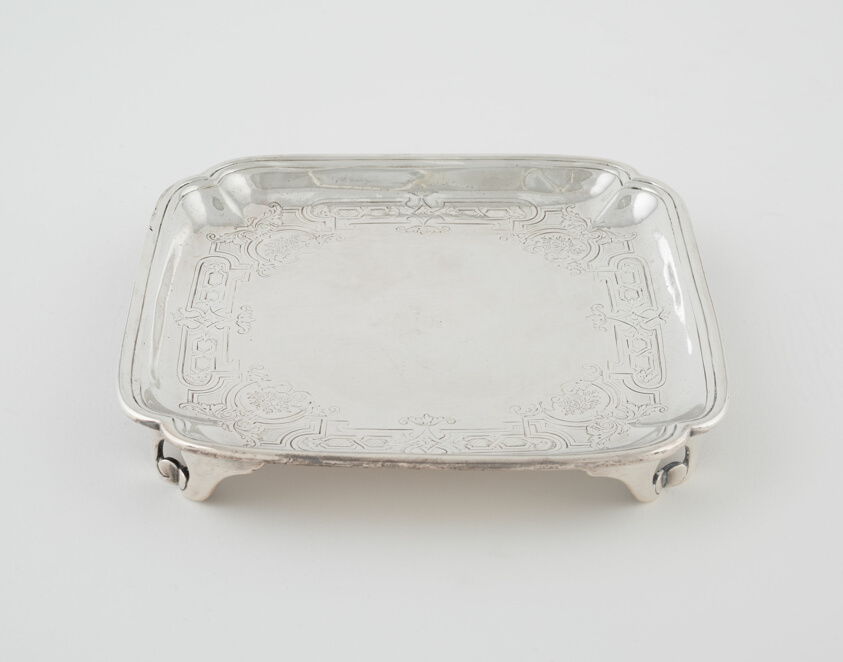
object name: Metalwork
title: Waiter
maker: Isaac Liger; English, active 1720; London, England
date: 1723/24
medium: Silver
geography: London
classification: silver; metalwork; european decorative arts